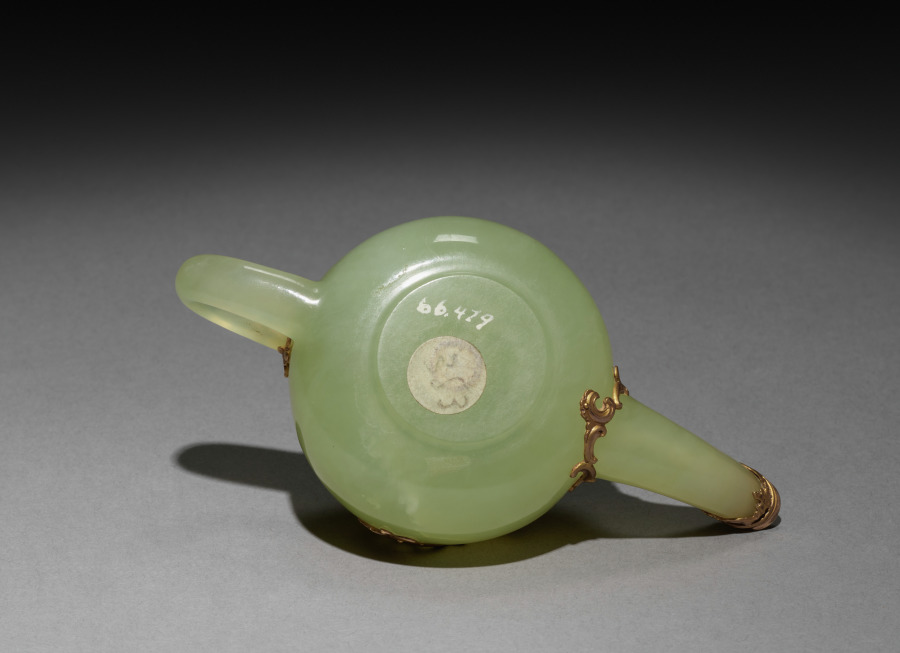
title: Miniature Teapot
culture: Russia, St. Petersburg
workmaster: Mikhail Evlampievich Perkhin (Russian, 1860–1903)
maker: House of Fabergé (Russian, 1842–1918)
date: 1886–96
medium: gold, bowenite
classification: Miniature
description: The House of Fabergé specialized in the creation of little treasures intended as opulent personal gifts. In creating luxurious accessories for a desk or tabletop, Fabergé often used native hardstones such as multicolored agate and quartz, green nephrite, pink rhodonite, rock crystal, and pale green bowenite found in the Ural Mountains of western Russia. Fabergé's designers often paired hardstones with gold mounts, particularly in the St. Petersburg workshop where the goldsmiths were concentrated.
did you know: Sometimes called "new jade," bowenite is actually considered a semi-precious gemstone. Though Fabergé obtained his supply from the Ural Mountains of Russia, bowenite is also the state mineral of Rhode Island.